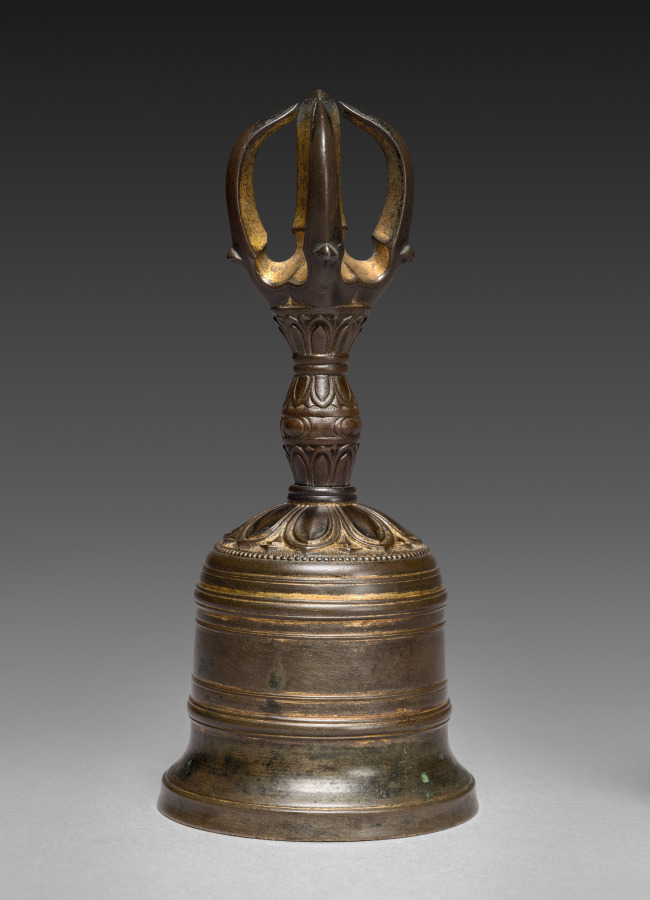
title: Five-pronged Vajra Bell (Gokorei)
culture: Japan, Kamakura period (1185–1333)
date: early 1300s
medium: gilt bronze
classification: Metalwork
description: The five prongs of this bell symbolize the Buddhist “Five Perfections”—generosity, morality, patience, perseverance, and concentration. The mouth of the bell symbolizes the “Sixth Perfection” of wisdom. The bell was used in Japanese Esoteric Buddhist rituals along with vajra pestles, or kongōsho.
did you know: Vajras are symbolic weapons, representing the properties of a diamond (indestructibility) and a thunderbolt (irresistible force), still used in Buddhist ceremonies today.